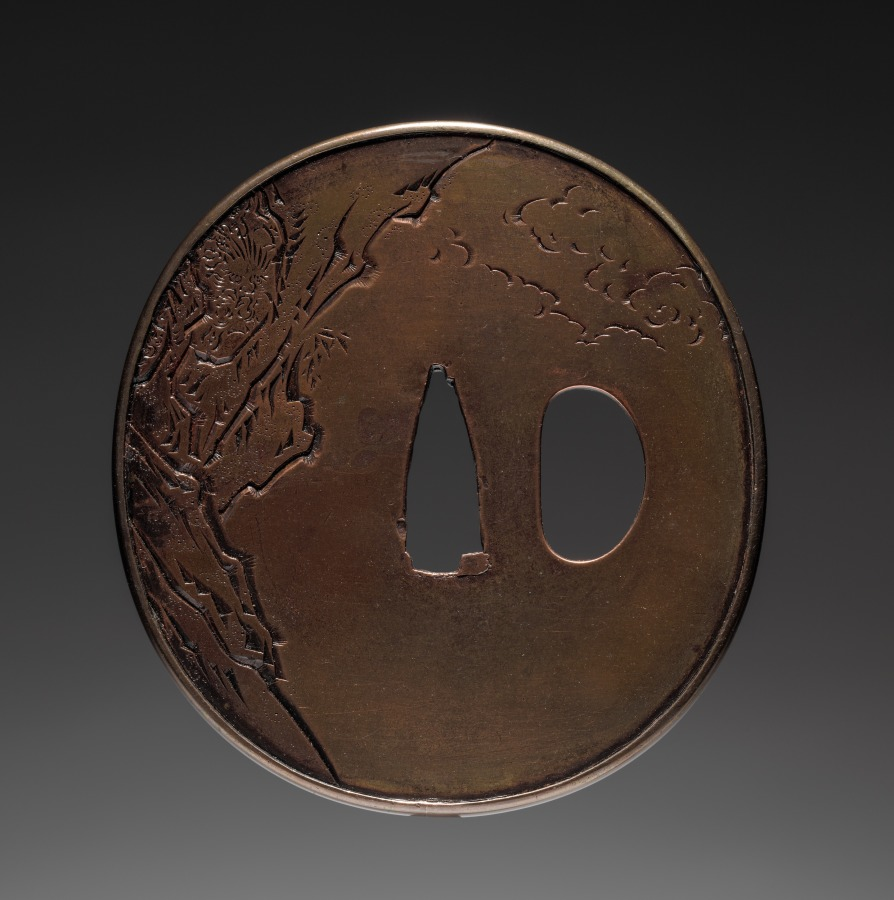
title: Sword Guard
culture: Japan, Edo period (1615–1868)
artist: Somin (Japanese)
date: early 1800s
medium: bronze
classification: Arms and Armor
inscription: Signature: Somin